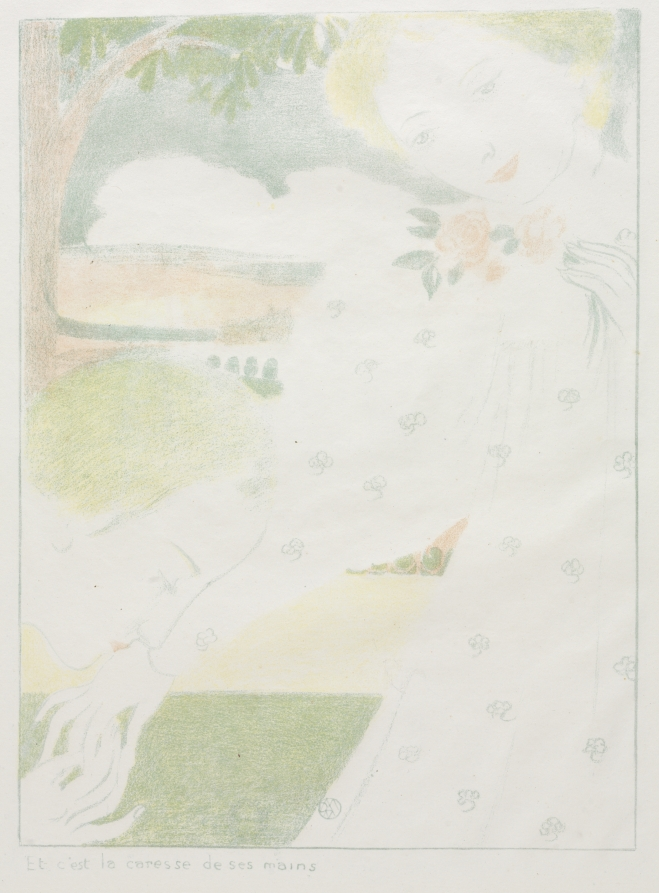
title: And It is the Caress of their Hands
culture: France, late 19th Century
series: Love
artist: Maurice Denis (French, 1870–1943)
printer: Auguste Clot (French, 1858–1936)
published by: Ambroise Vollard (French, 1867–1939)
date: 1898, published 1899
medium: lithograph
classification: Print